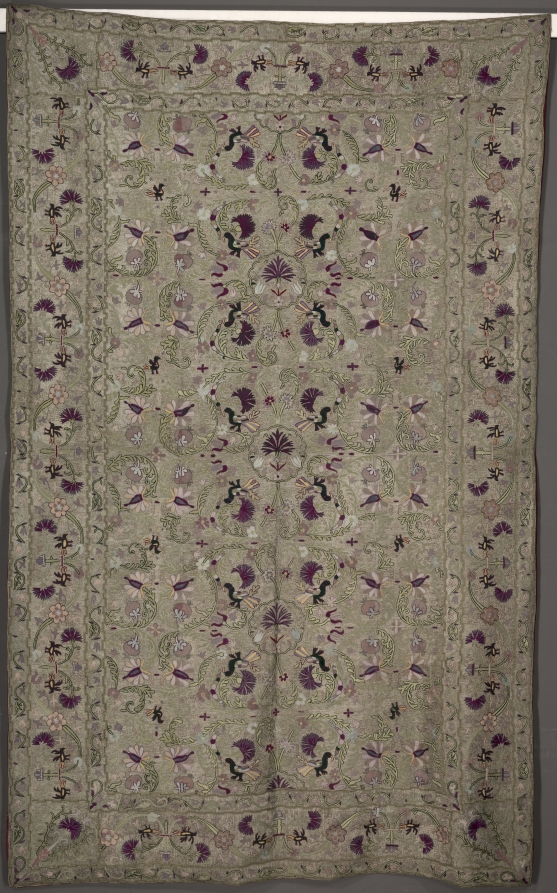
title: Coverlet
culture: India, 19th century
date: 1800s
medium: embroidery; silk and gold filé on linen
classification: Embroidery